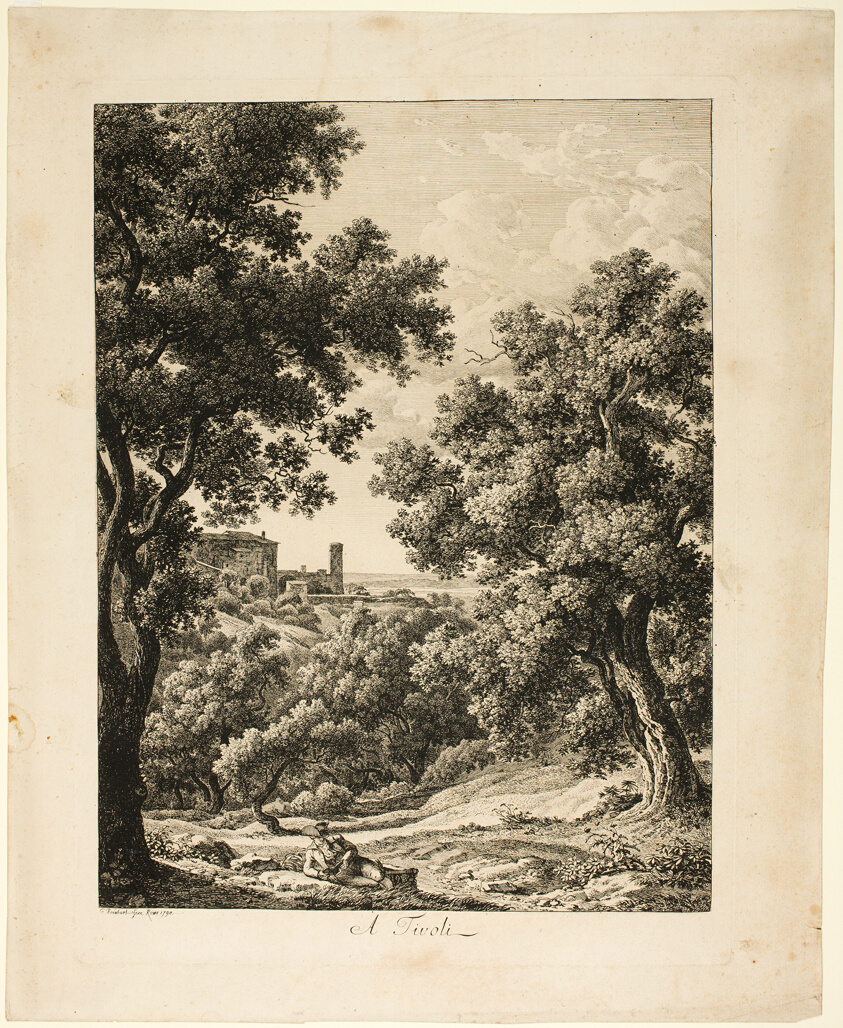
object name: Print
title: In Tivoli (A Tivoli), from the series Picturesque Views of Italy (Malerisch Radierte Prospekte aus Italien)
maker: Johann Christian Reinhart (German, 1761-1847)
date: 1794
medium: Etching on cream laid paper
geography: Germany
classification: etching; print; prints and drawing